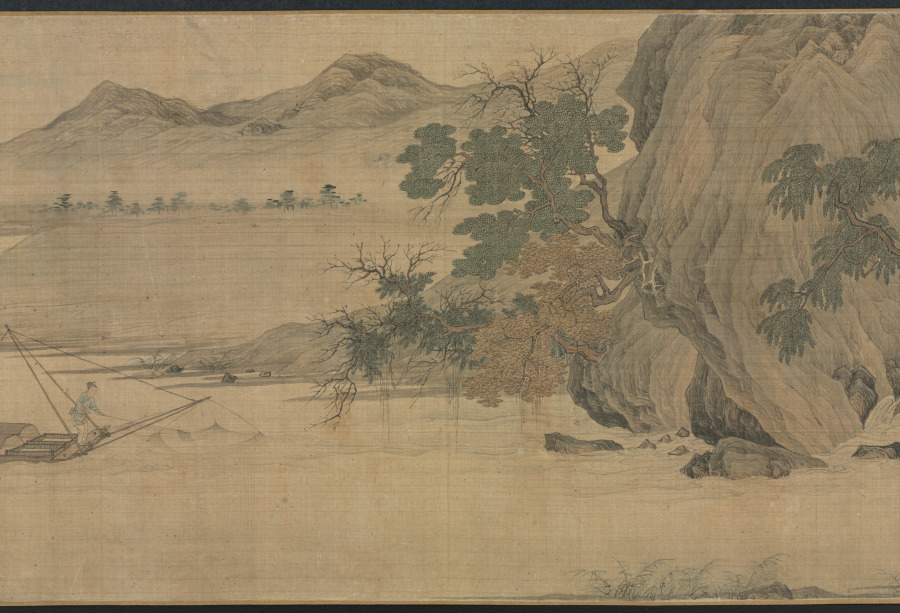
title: Scholar-Hermits in the Autumn Mountains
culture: China, Ming dynasty (1368–1644)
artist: Tang Yin (Chinese, 1470–1523)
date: 1500–1510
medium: handscroll, ink and light color on silk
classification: Painting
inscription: Artist's signature and 2 seals at end of scroll: Tang Yin [seals] T'ang Po-hu; T'ang Tzu'wei t'u-shu.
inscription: Title on frontispiece by Li Cho-kung (dates unknown).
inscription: 1 colophon and 11 additional seals: 1 colophon dated 1915 of Wu Tso-hsi (19th-20th c.); 2 seals of Gao Qifeng 高奇峰 (1889–1933); 5 seals of C. C. Wang 王季遷 (1907–2003); 4 seals unidentified.